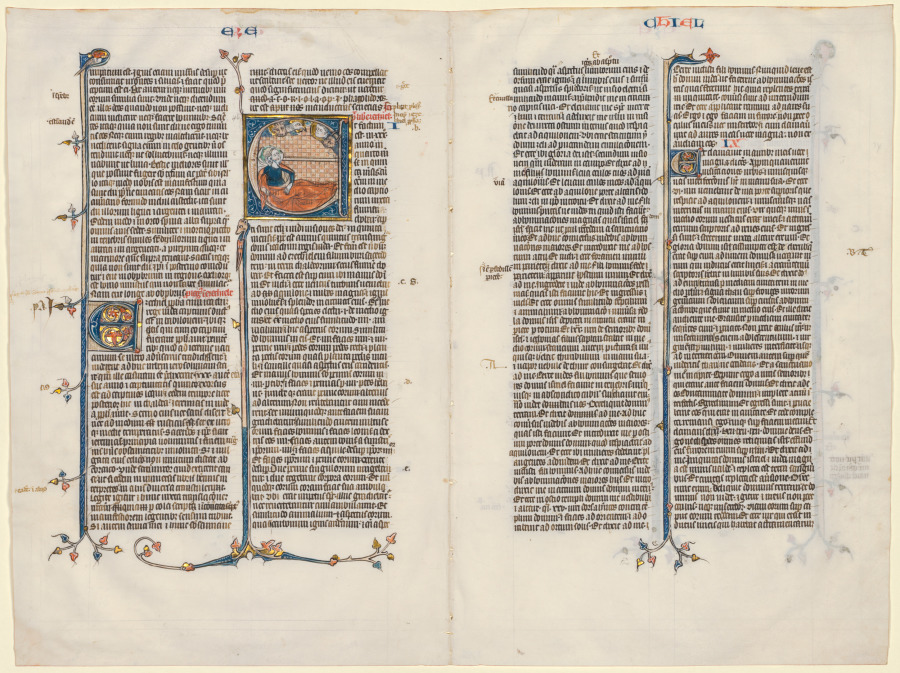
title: Bifolium from a Bible: Initial E[t factum est] with Ezekiel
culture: France, Paris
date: c. 1290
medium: ink, tempera, and gold on vellum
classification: Manuscript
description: This large initial E on the left page introduces the Book of Ezekiel. The prophet is represented in the midst of his apocalyptic visions. Ezekiel's call to prophecy began as a vision showing God enthroned among four creatures, each with four wings and the face of a man, lion, ox, and eagle, respectively. These apocalyptic beasts recur in the Book of Revelation and were developed by the medieval Church into symbols of the Evangelists: Matthew, Mark, Luke, and John. Since medieval manuscripts were not paginated, this large initial provided a clear visual cue for the reader to help locate the text of Ezekiel within the manuscript.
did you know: This bifolium was likely once part of a Carthusian Bible; the initials in the margin are part of a unique reading system used by Carthusian monks.